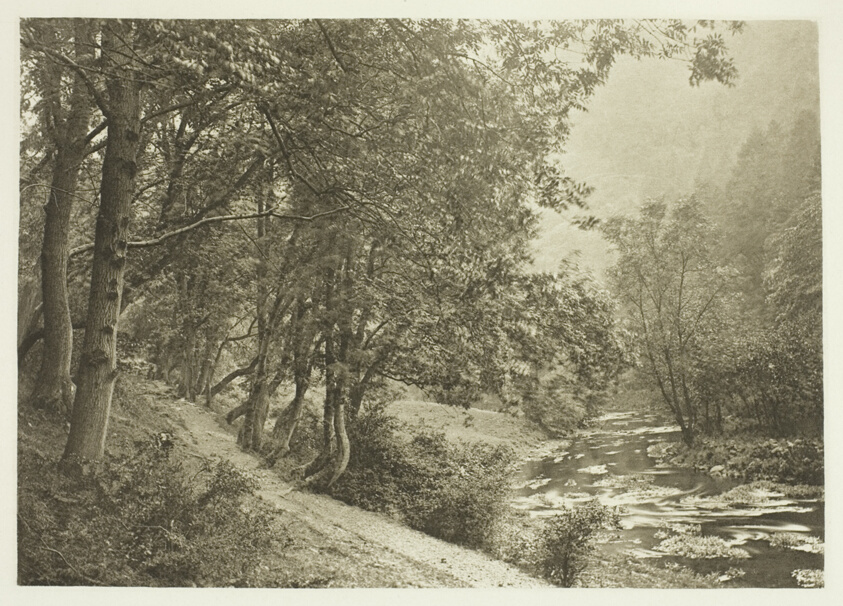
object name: Photograph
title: The Path Over The First Brae, Dove Dale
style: 19th century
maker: Peter Henry Emerson (English, born Cuba, 1856–1936)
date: 1880s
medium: Photogravure, plate XLI from the album "The Compleat Angler or the Contemplative Man's Recreation, Volume II" (1888)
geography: England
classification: photogravure; photomechanical process; photography; photograph